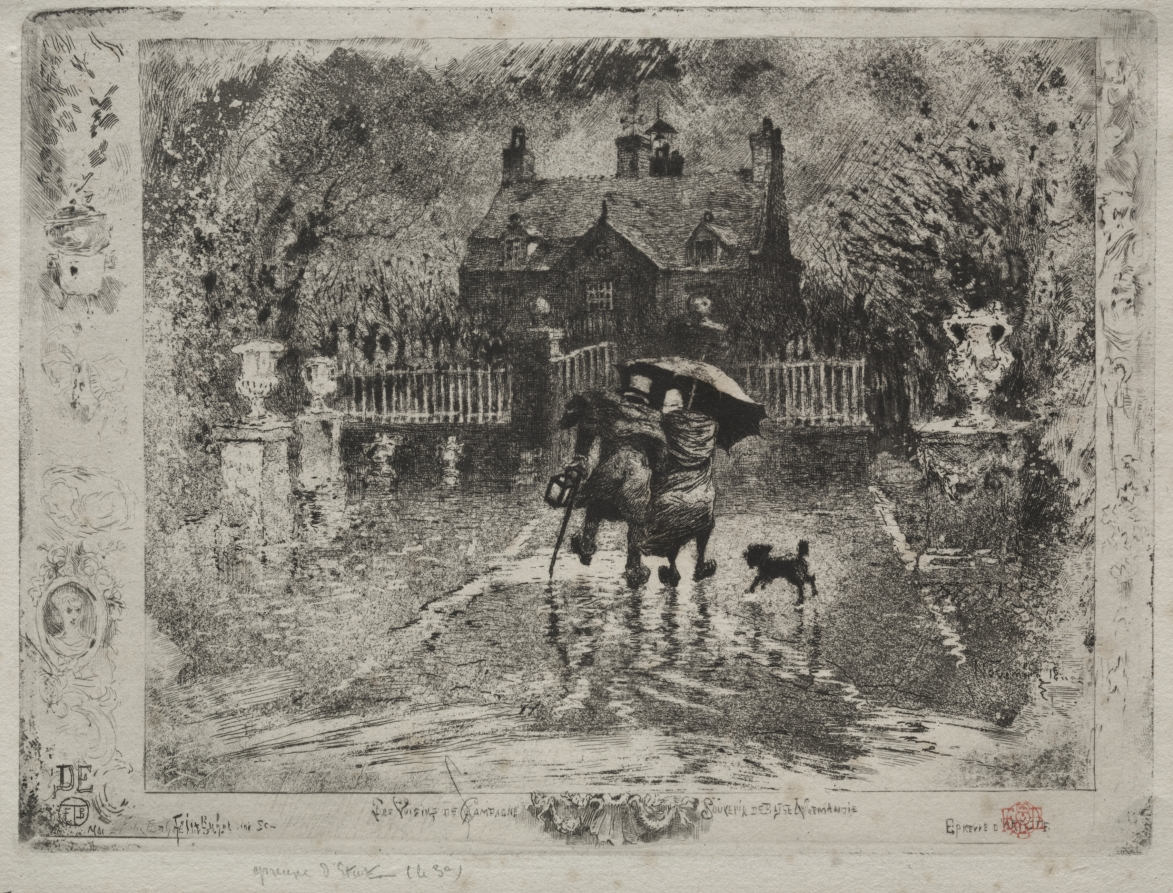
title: The Country Neighbors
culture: France, 19th century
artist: Félix Hilaire Buhot (French, 1847–1898)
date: 1879–1880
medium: etching, drypoint and aquatint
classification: Print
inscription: inscribed, lower left, in graphite: epreuve d'Etat (le 3e)